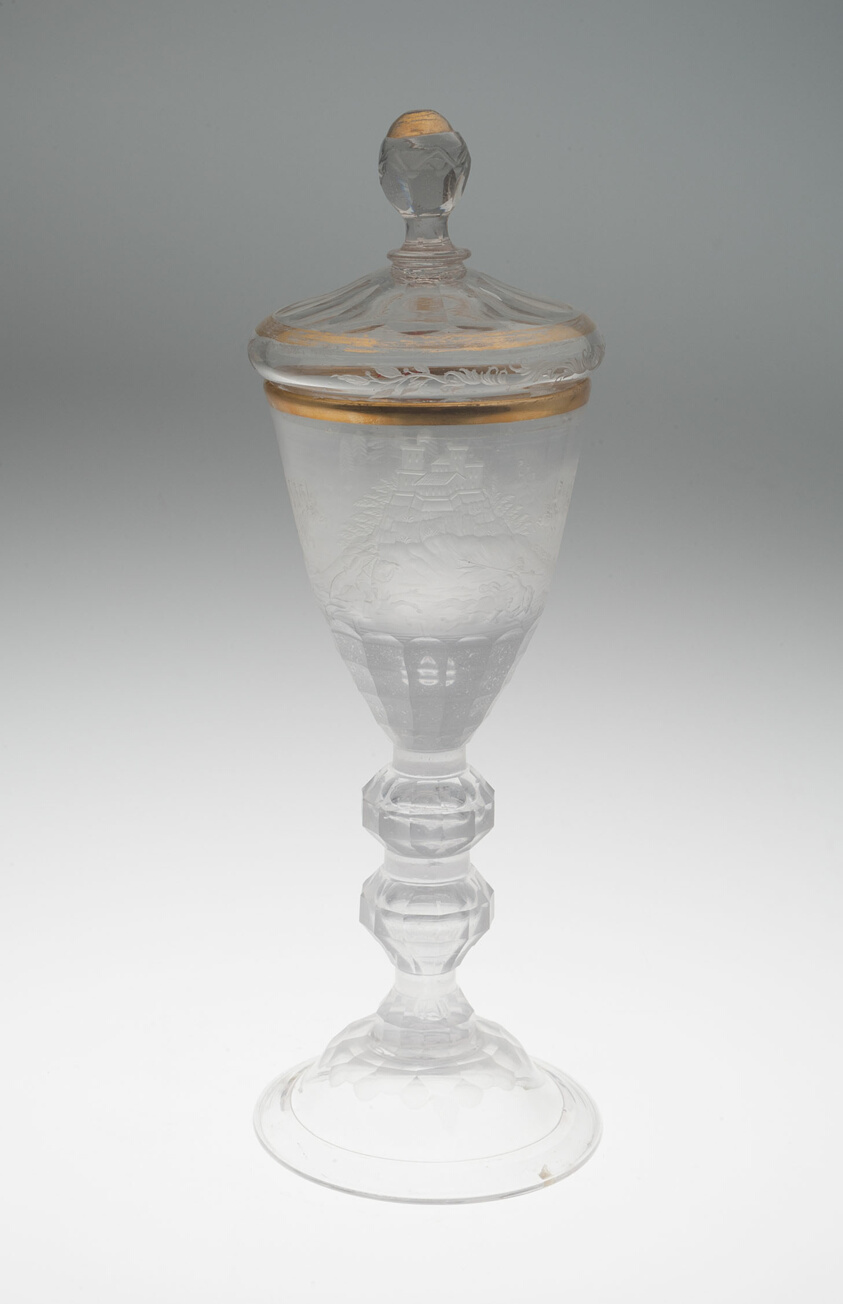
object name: Glass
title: Wine Glass and Cover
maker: Germany, Lauenstein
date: c. 1756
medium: Glass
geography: Lauenstein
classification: drinking vessel; glass; european decorative arts